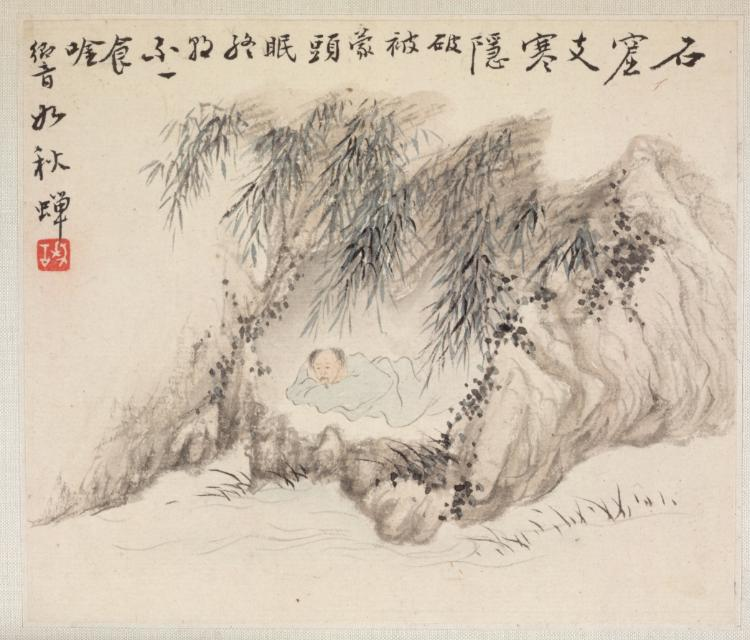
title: Album of Landscape Paintings Illustrating Old Poems: Man Resting under Bamboo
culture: China, Qing dynasty (1644-1911)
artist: Hua Yan (Chinese, 1682–c. 1765)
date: 1745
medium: album leaf, ink and light color on paper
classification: Painting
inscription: Calligraphy above and to left of image; seal below calligraphy on left